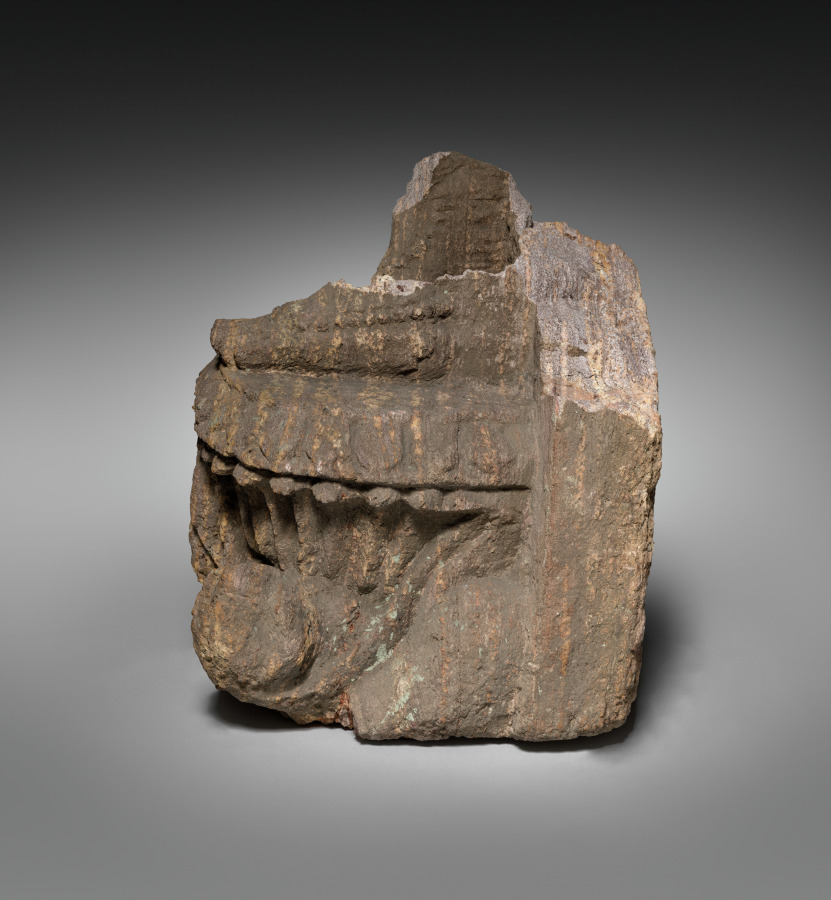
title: Base and Feet of Devata or Yakshi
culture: India, Province of Orissa, 20th century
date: 20th century fake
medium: sandstone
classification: Sculpture